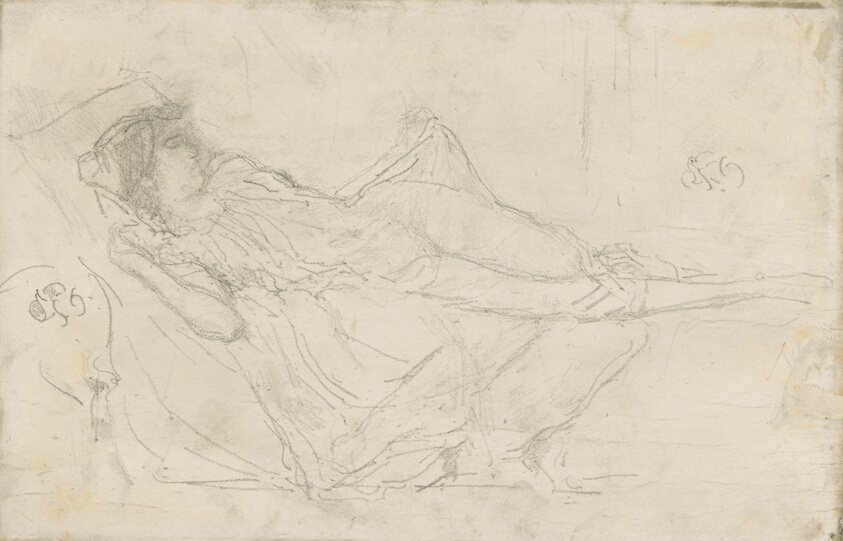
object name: Drawing and Watercolor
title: Reclining Draped Figure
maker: James McNeill Whistler (American, 1834-1903)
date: 1893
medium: Lithographic crayon, with traces of scraping and stumping, on fine-grained transfer paper laid down on cream wove paper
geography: United States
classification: drawings (visual works); prints and drawing; paper